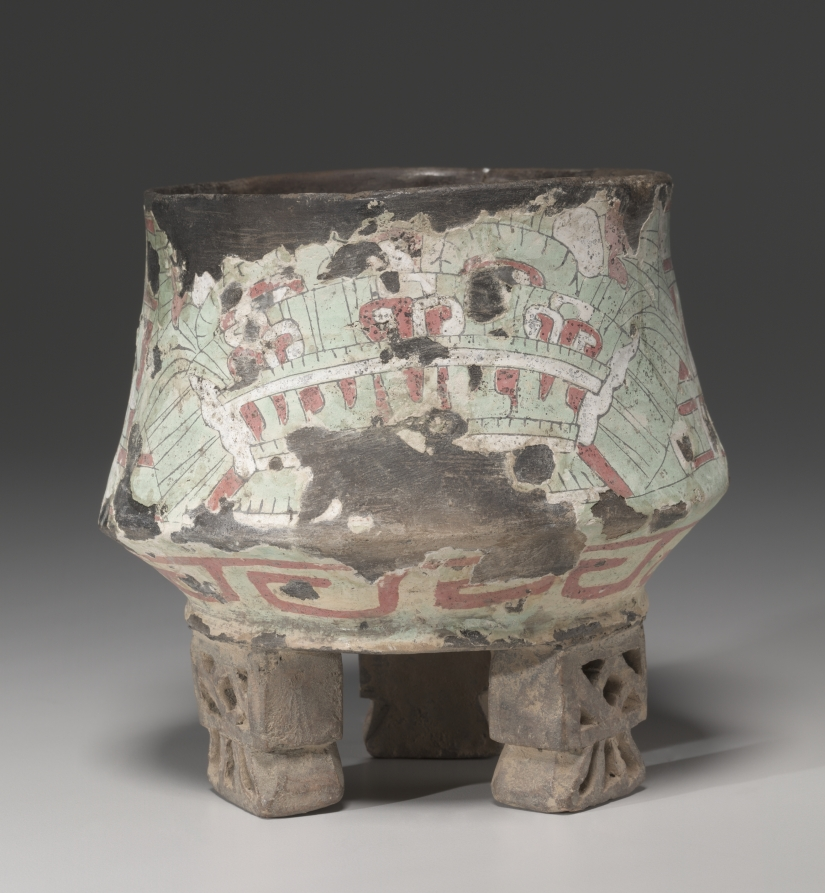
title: Vessel with Butterfly Headdress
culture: Central Mexico, Teotihuacán, Classic period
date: 1–550 CE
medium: ceramic, stucco, pigment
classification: Ceramic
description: The headdress shown on this vessel combines a serpent's mouth with a butterfly's proboscis (feeding tube), which curls between the eyes. The butterfly often appears in the headdress of the Great Goddess, an extremely important Teotihuacán deity. Stucco (paper-thin, painted plaster) is fragile and usually does not survive well; the stucco of the basin in this case has been repaired.